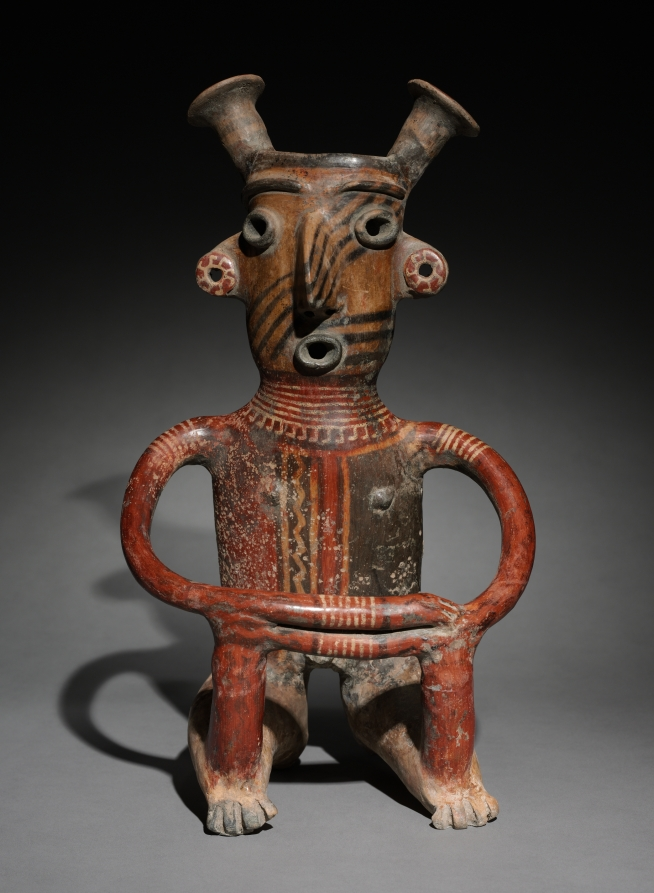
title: Seated Male Figure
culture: Mexico, Jalisco, Zacatecas Style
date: c. 200 CE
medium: earthenware with colored slips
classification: Sculpture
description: A female once accompanied this abstract male. The two may have had the same meaning as the nearby couple. They were also similarly linked by physical form, though the female’s head had no projections, the meaning of which is unknown. The size of the circle formed by the arms suggests that the figure once held something, perhaps a perishable offering.